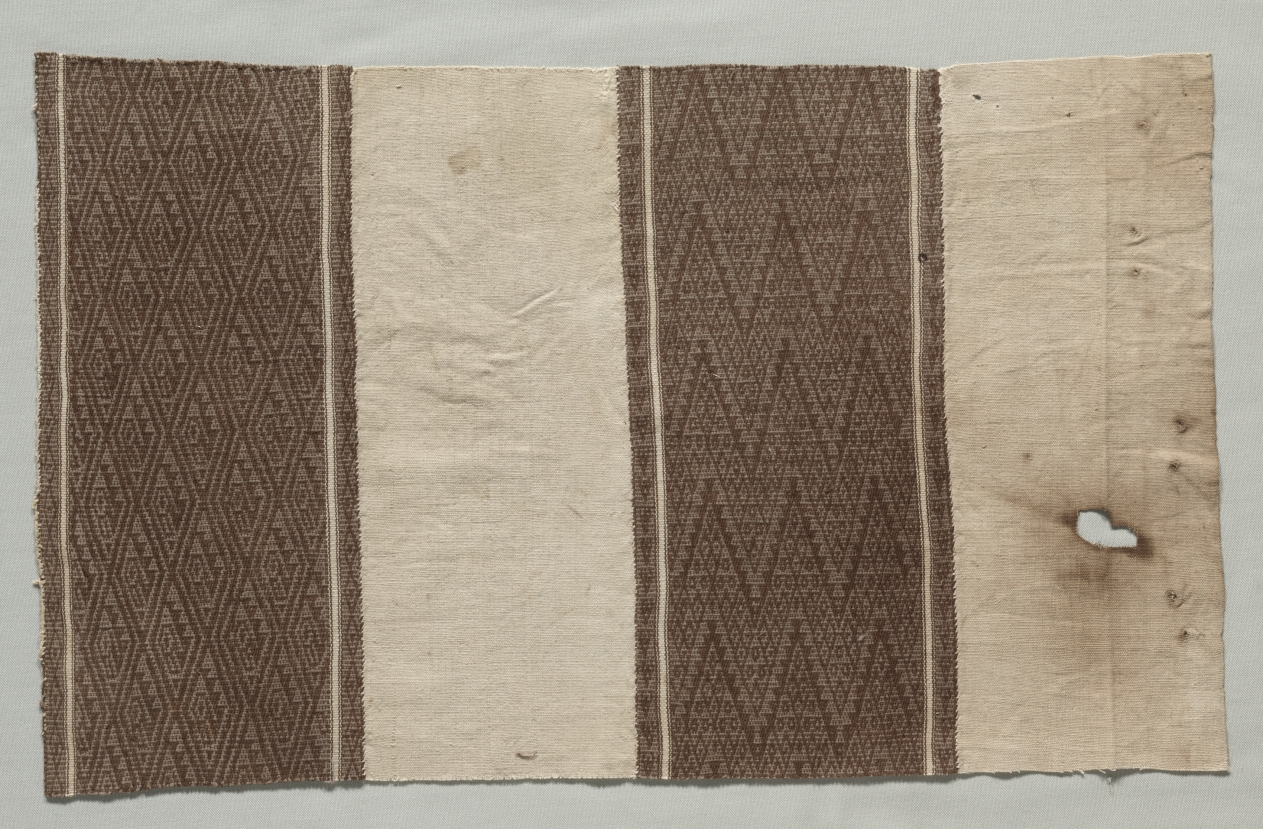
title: Fragment formed of Four Separate Fabrics Joined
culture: Peru, Central Coast, Chancay, 12th-15th century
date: c. 1100–1400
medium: two pieces plain cloth, two pieces compound twill; cotton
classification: Textile